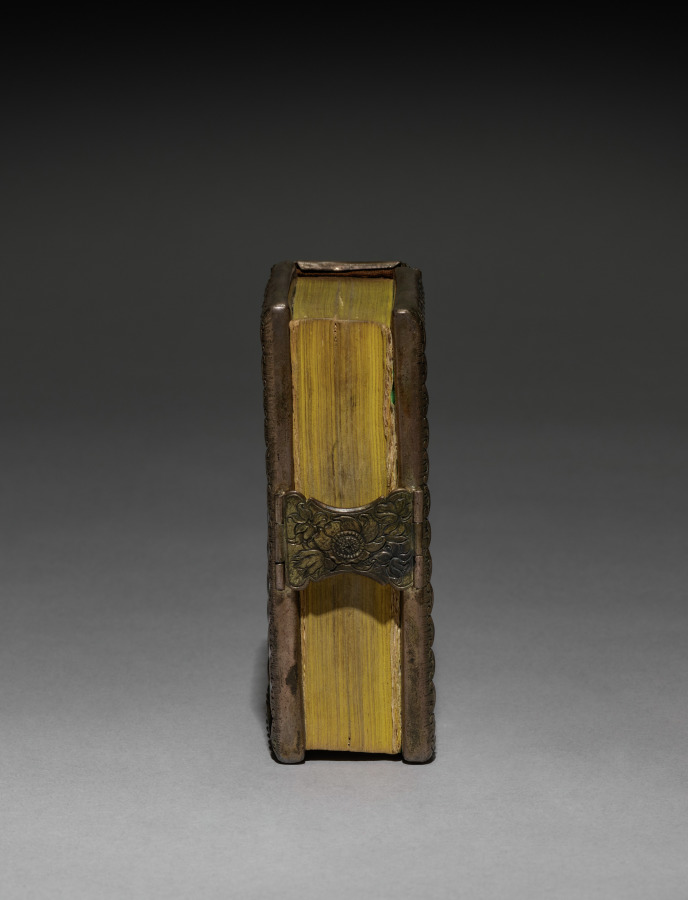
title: Carnet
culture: Sweden, 19th century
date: 1863–1865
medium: enamel on copper and silver gilt book binding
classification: Miscellaneous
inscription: inside is psalm book written in German, with handwritten dedication on cover, dated 25 May 1865.